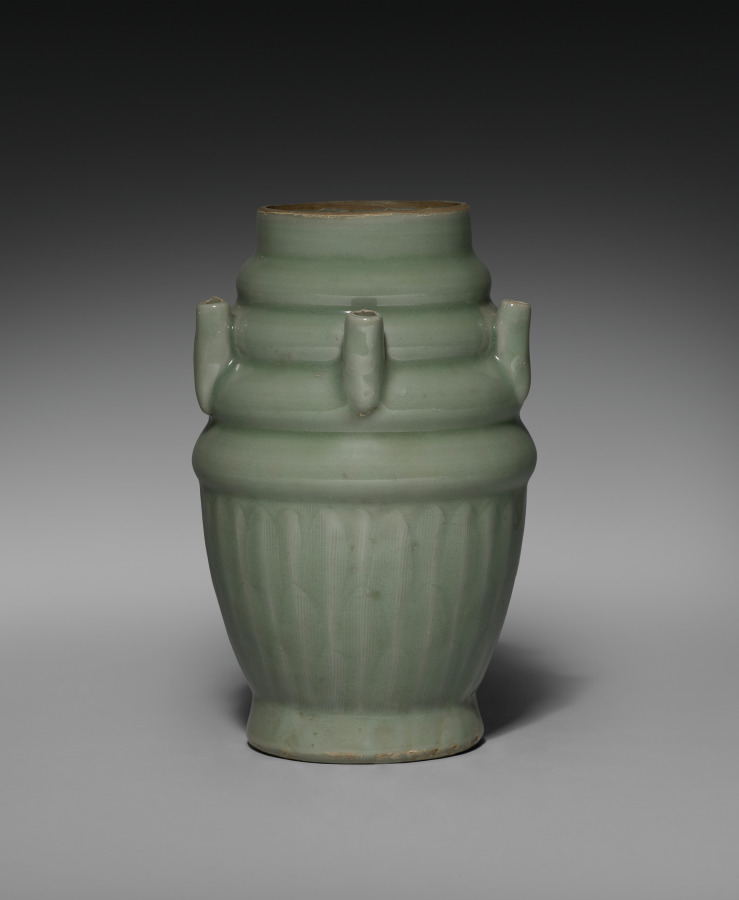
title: Five-Spouted Vase with Cover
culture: China, Zhejiang province, Longquan region, Northern Song dynasty (960-1127)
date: 1000s-1100s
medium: green-glazed porcelaneous stoneware, Longquan ware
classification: Ceramic